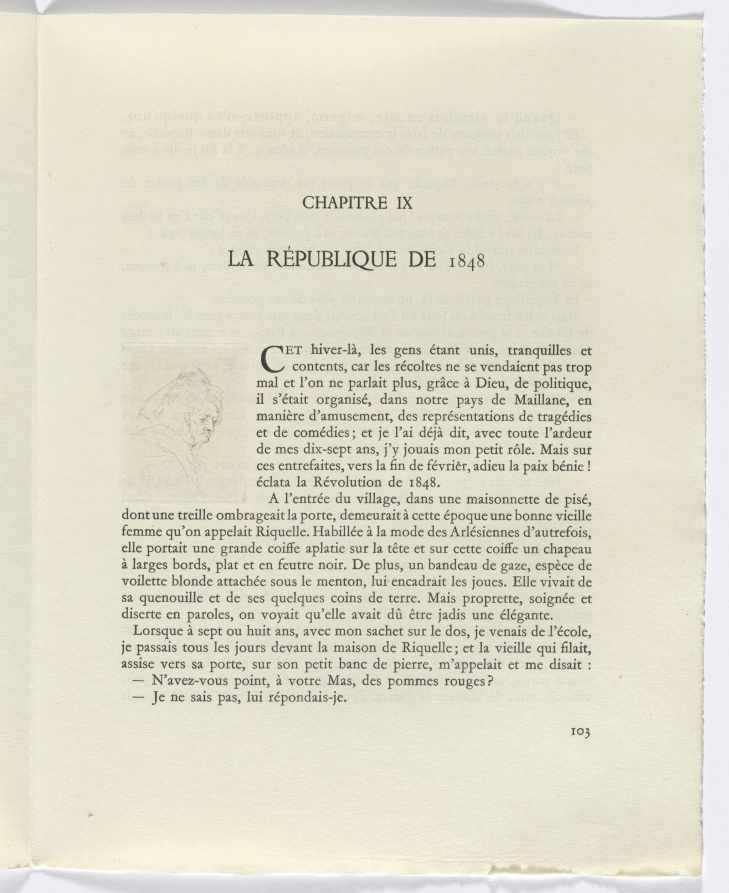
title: Frédéric Mistral: Mémoires et Recits by Frédéric Mistral: bust of a woman (page 103)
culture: France, 20th century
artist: Auguste Brouet (French, 1872–1941)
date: 1937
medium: etchings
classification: Portfolio